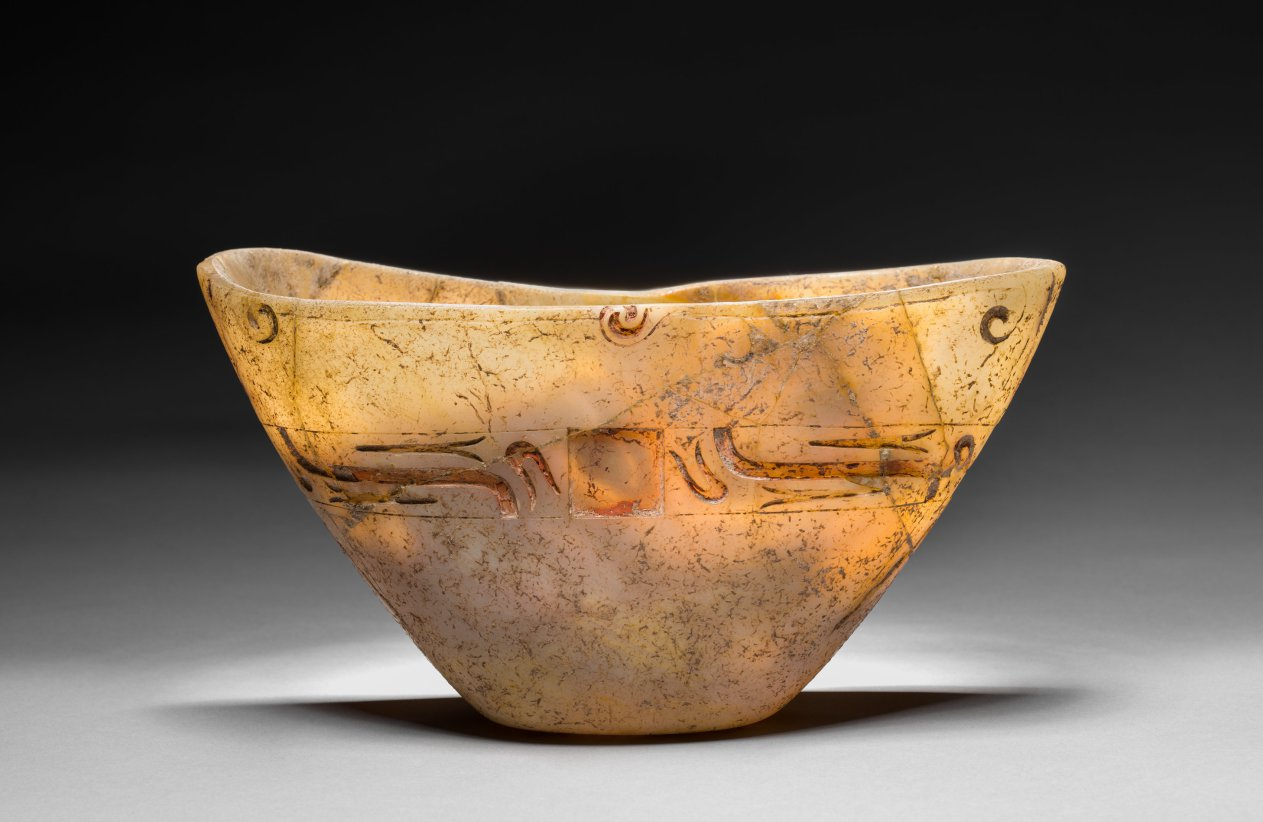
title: Carved Bowl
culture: Mesoamerica, reportedly the Tepecoacuilco River Valley, Guerrero, Olmec style (1200-300 BC), Formative Period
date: 1200–300 BCE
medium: stone (travertine)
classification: Stone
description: Containers made of translucent white travertine, known among the later Aztecs as tecali, are rare in Olmec artistic production. The shape of this elegant example, its rim pinched inward at the center, may refer to a squash. The meaning of the deeply carved abstract motifs, which retain traces of red pigment, is unknown. The bowl is said to have been found in a burial cache that included an Olmec figurine, a hematite mirror, and jade ornaments in Guerrero, Mexico.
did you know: Travertine is a type of limestone deposit commonly found in caves and hot springs.